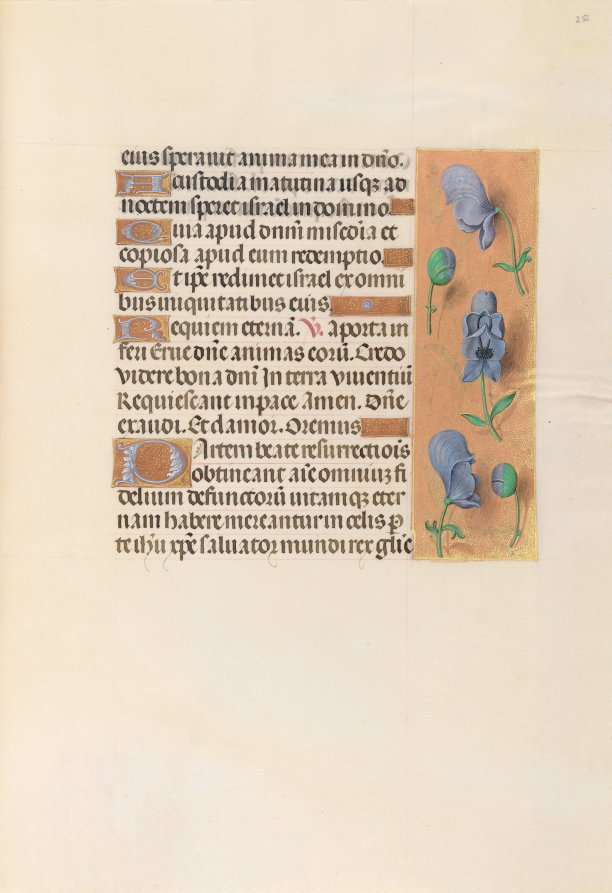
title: Hours of Queen Isabella the Catholic, Queen of Spain: Fol. 256r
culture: Flanders, Ghent and Bruges, late 15th century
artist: Master of the First Prayerbook of Maximillian (Flemish, c. 1444–1519)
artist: and Associates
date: c. 1500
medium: ink, tempera, and gold on vellum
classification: Bound Volume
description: This manuscript was illuminated by a circle of at least five highly organized manuscript painters active in the Flemish cities of Ghent and Bruges. The principal illuminator was Alexander Bening, who painted the majority of the book's miniatures. Manuscripts produced by this circle of artists are renowned for the decoration of their borders, which typically feature a rich variety of realistically-painted flowers, birds, and butterflies. This prayer book, called a book of hours, was intended not for a cleric, but for the private devotions of a lay person-in this case, Isabella the Catholic, Queen of Spain (1451-1504). Isabella's coat of arms embellishes the book's frontispiece. It is unlikely that the book was commissioned by the Queen herself; rather, she probably received it as a diplomatic gift from someone courting her patronage, perhaps Cardinal Francisco Jimenez de Cisneros. A Franciscan friar, Jimenez was dependent upon Isabella for his advancement, first to the post of Queen's confessor in 1492, and then to Archbishop of Toledo in 1495.